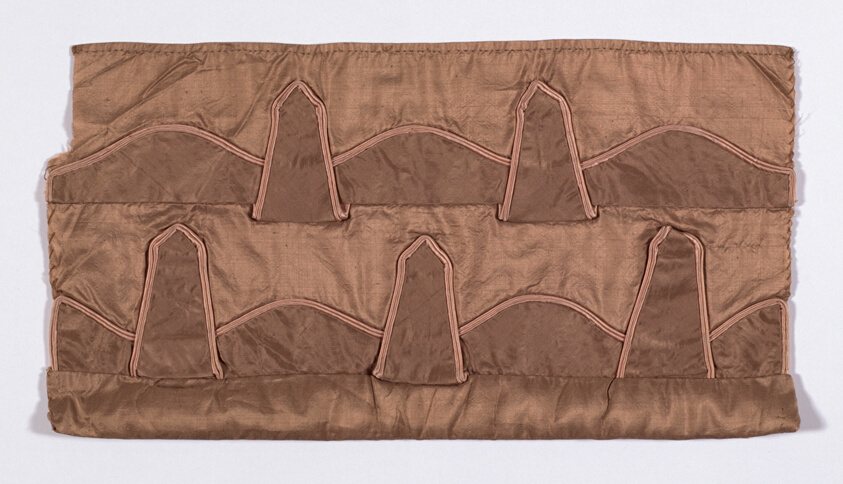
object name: Textile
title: Sample (Dress Trimming)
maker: England or France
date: 1815/35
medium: Silk, plain weave; appliquéd with silk, plain weaves, edged with silk, satin weaves; turned and padded (cotton?) hem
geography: France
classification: textile; needlework - costume; weaving